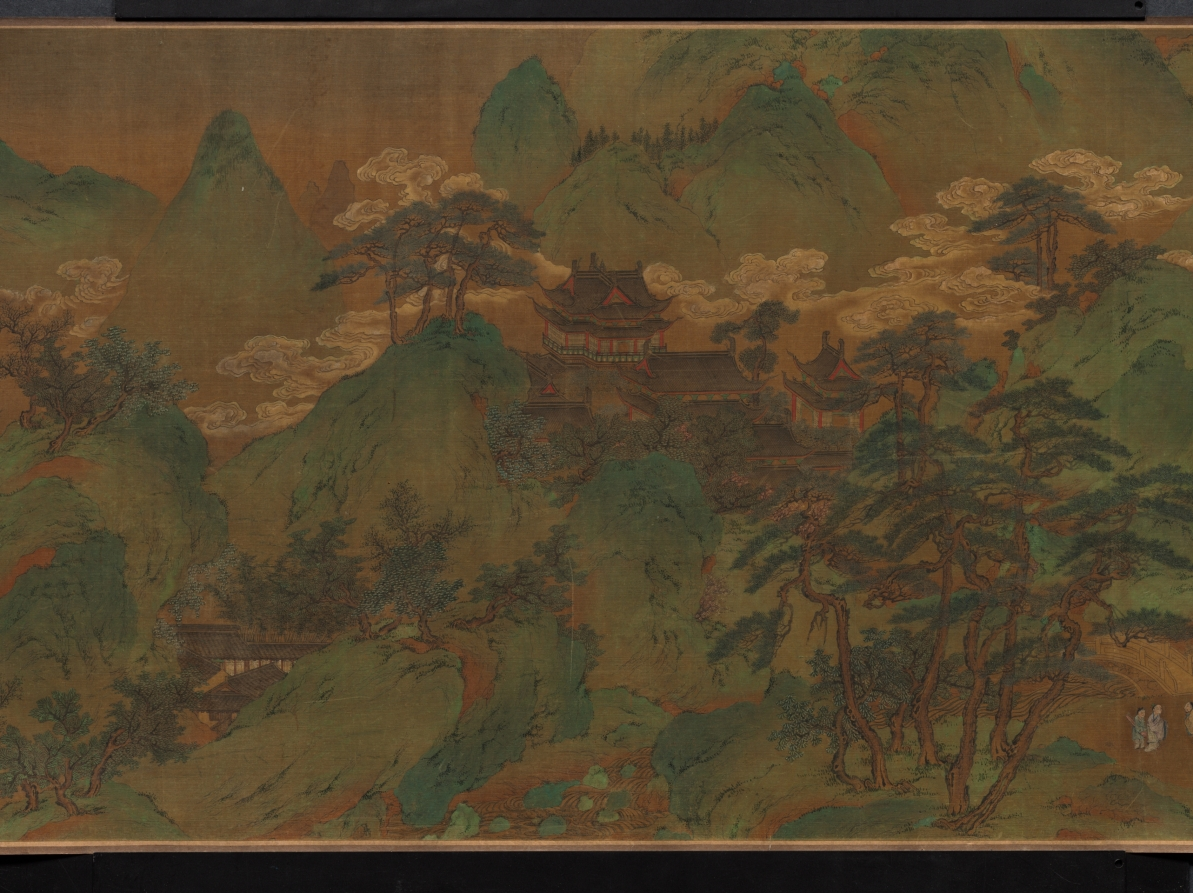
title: Landscape, The Palace of the Clouds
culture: China, Qing dynasty (1644-1911)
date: 1644–1911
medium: handscroll, ink on silk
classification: Painting